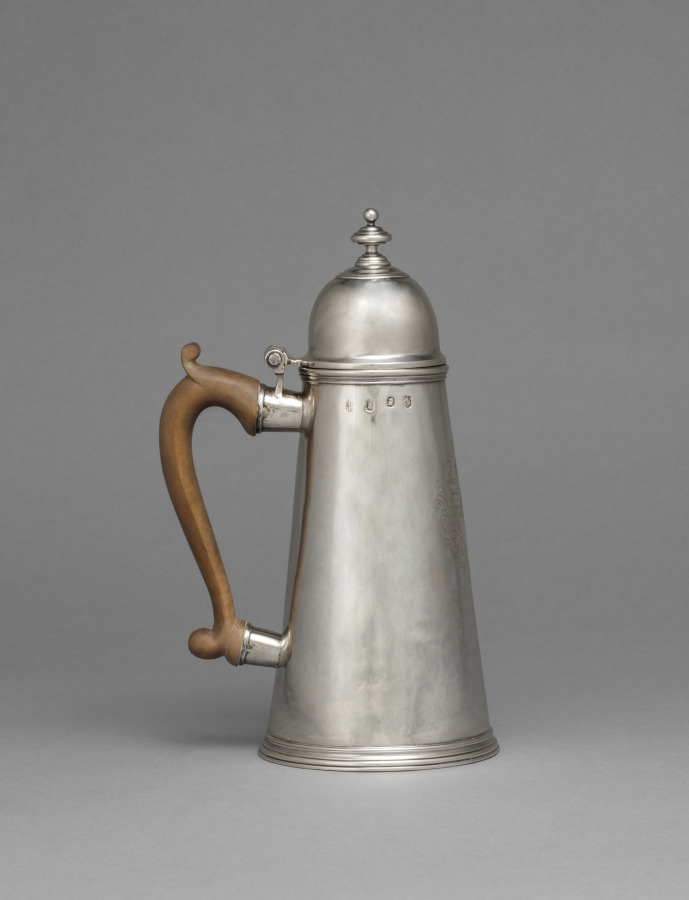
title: Coffee Pot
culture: England, London, 18th century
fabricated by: John Chartier (British)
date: 1702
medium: silver, wooden handle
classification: Silver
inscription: scratched on base: "21=16"; "21=12." Coat of arms engraved in contemporary mantling: oak tree with four lower branches beginning to sprout. (Arms of "Here" family.)